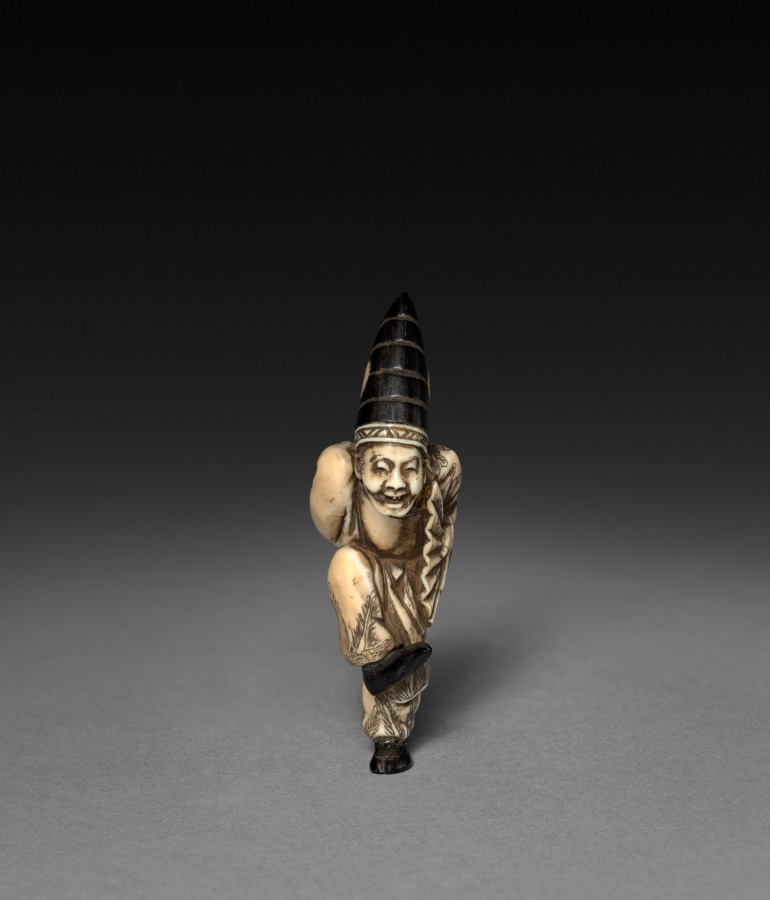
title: Dancing Man with Fan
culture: Japan, Edo period (1615–1868)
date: early to mid-1800s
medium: ivory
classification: Netsuke